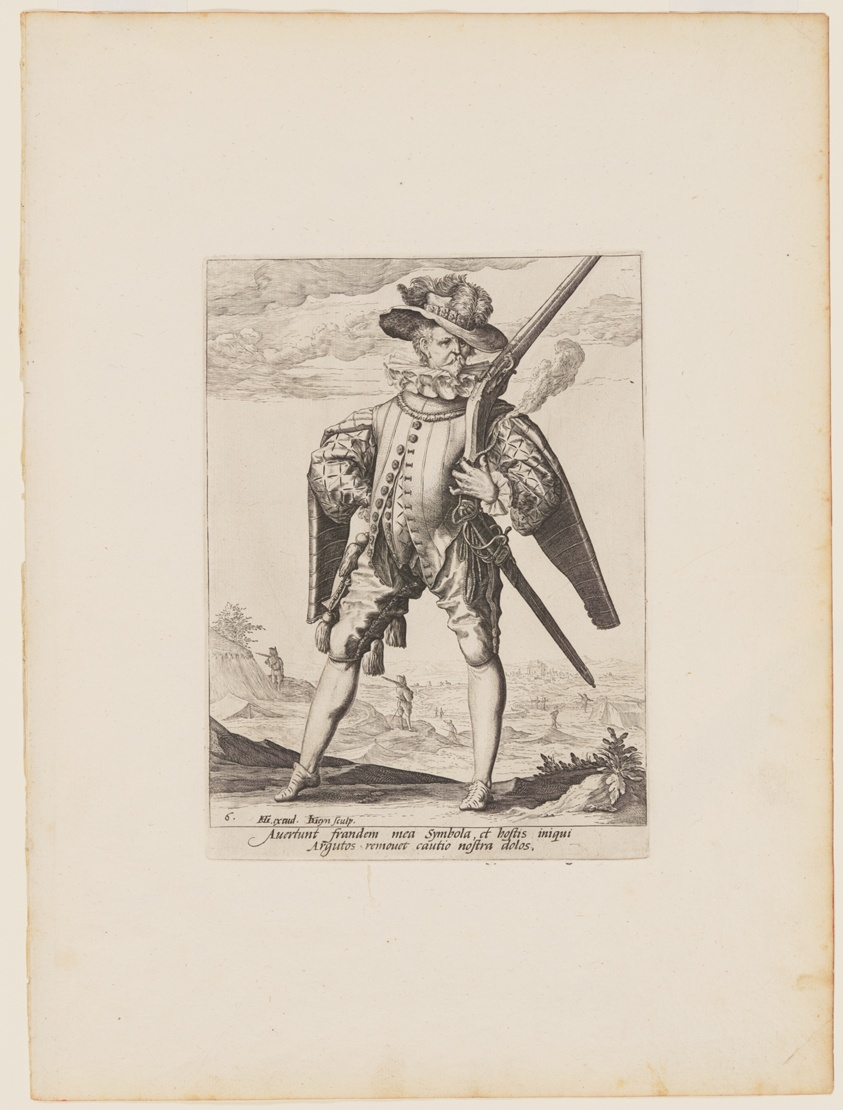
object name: Print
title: Musketeer, from Officers and Soldiers of the Bodyguard of Emperor Rudolph II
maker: Jacques de Gheyn II (Dutch, 1565–1629); after Hendrick Goltzius (Dutch, 1558–1617)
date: 1587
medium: Engraving on ivory laid paper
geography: Netherlands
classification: engraving; paper; print; prints and drawing